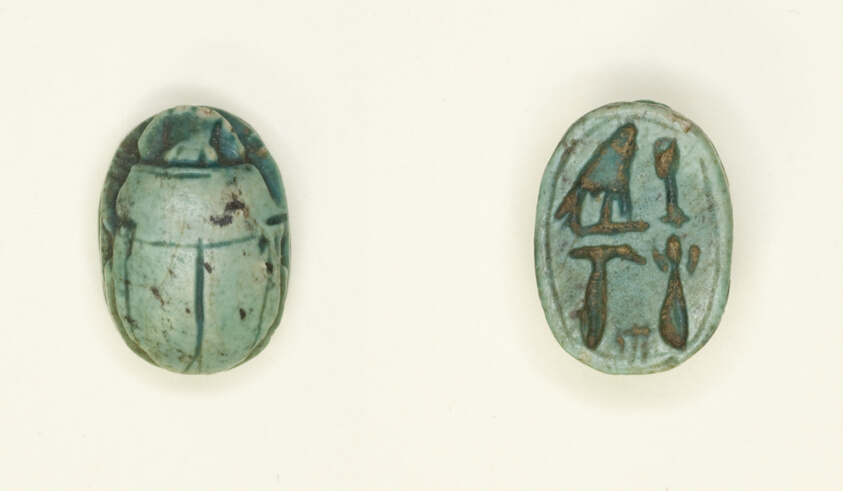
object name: Costume and Accessories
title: Scarab: Falcon and Hieroglyphs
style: egyptian, ancient, late period (egyptian), new kingdom, third intermediate period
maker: Egyptian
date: New Kingdom–Late Period, Dynasties 18–26 (about 1550–525 BCE)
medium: Glazed steatite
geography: Egypt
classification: scarab; ancient art; costume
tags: Hieroglyphs, falcons, insects